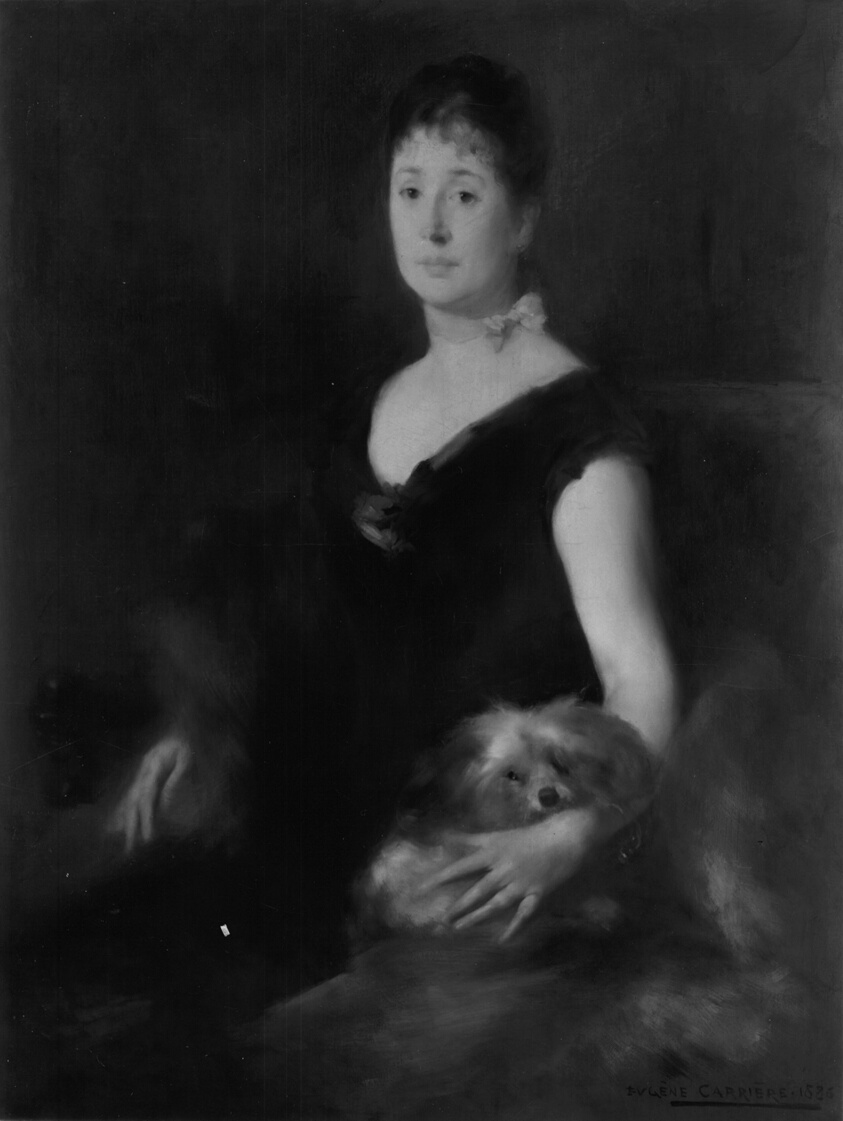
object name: Painting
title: Portrait of a Lady with a Dog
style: 19th century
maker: Eugène Carrière (French, 1849–1906)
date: 1885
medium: Oil on canvas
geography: France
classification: oil on canvas; french; oil paintings (visual works); paint; painting; european painting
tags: Century of Progress, dog, dresses, portrait, portraits, portraits: female subject, wealth, woman, women, world's fairs, Chicago World's Fairs